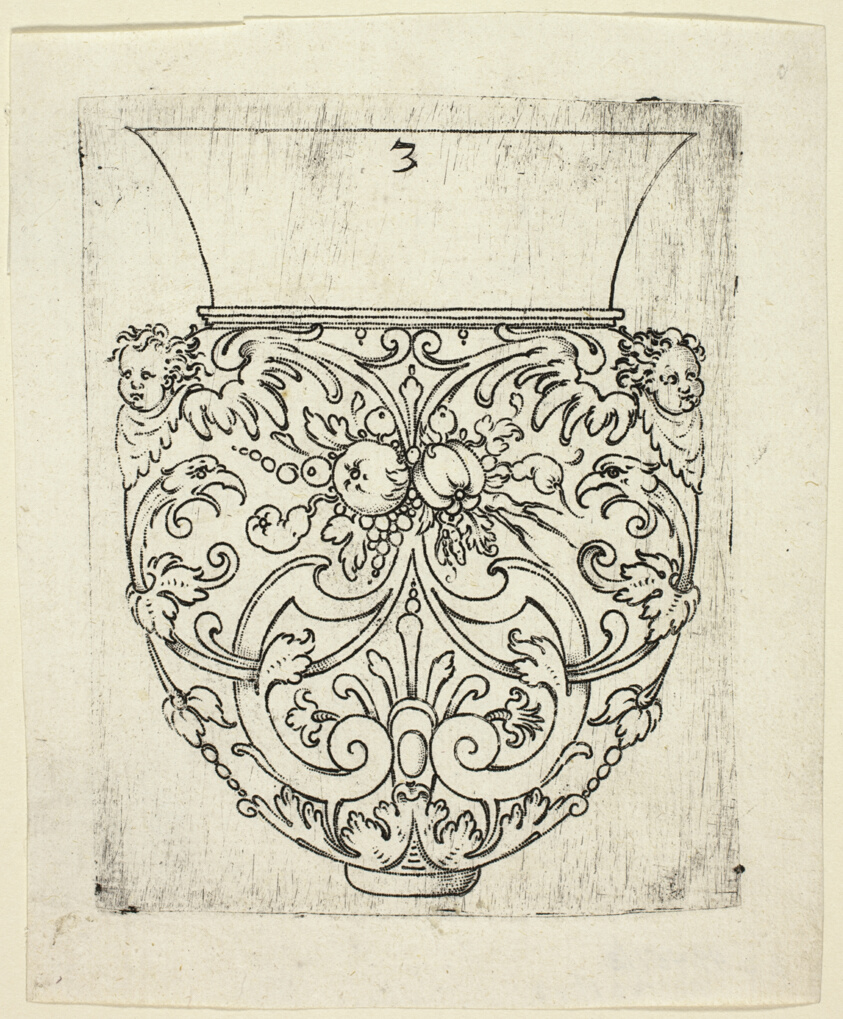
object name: Print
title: Plate 3, from twenty ornamental designs for goblets and beakers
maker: Master A.P. (German, active early 17th century)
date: 1604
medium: Punch engraving in black on ivory laid paper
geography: Germany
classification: engraving; print; prints and drawing